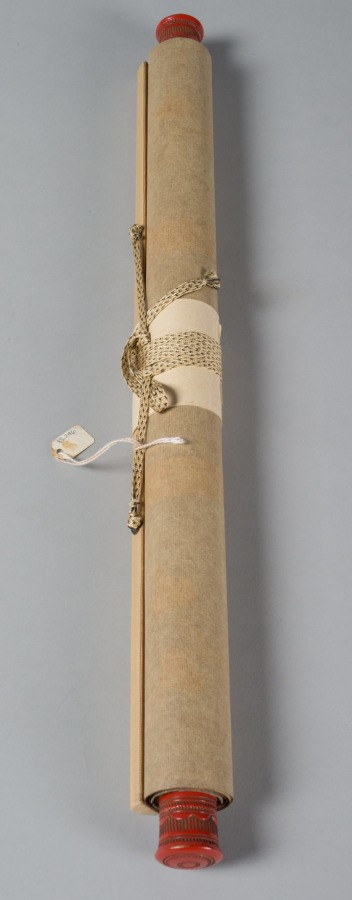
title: Birds in a Tree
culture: Japan, Edo period (1615–1868)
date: c. 1700–1868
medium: hanging scroll; silk gauze brocaded with gold and silk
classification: Textile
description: This scene of two Chinese pheasants with a flowering plum tree (a sign of the arrival of spring in Japan) is not painted. All the lines and surfaces are created by colored threads carefully stitched together into the silk. Consequently, the surface appears quite different from paintings on paper.